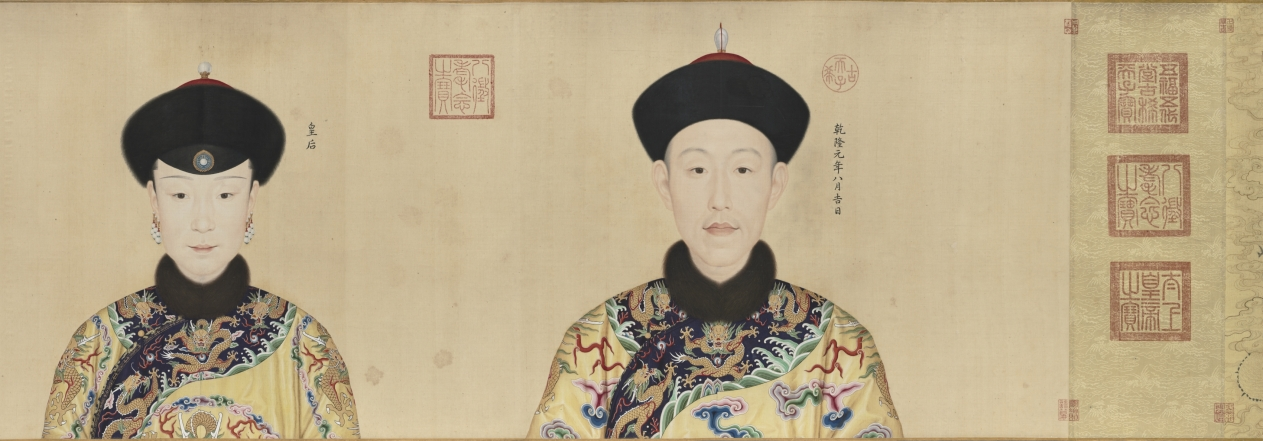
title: Portraits of the Qianlong Emperor and His Twelve Consorts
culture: China, Qing dynasty (1644–1911), Qianlong reign (1736–95)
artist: Giuseppe Castiglione (Italian, 1688–1766)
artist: and others (Chinese)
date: 1736–70s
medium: Handscroll; ink and color on silk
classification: Painting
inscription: 9 seals of the Qianlong emperor (r. 1736–95).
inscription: The eighth month, first year of Qianlong [1736] 乾隆元年八月吉日. The Empress (Xiaoxian) 皇后 (1712–1748), The Guifei (Huixian) 貴妃 (?-–1745), Chunfei 純妃 (1713–1760), Jiafei 嘉妃 (?–1755), Lingfei 令妃 (1727–1775), Shufei 舒妃 (1728–1777), Qingbin 慶嬪 (1724–1774), Yingbin 穎嬪 (1731–1800), Xinbin 忻嬪 (?–1764), Dunfei 惇妃 (1746–1806), Xunfei 順妃 (1749–1788), Shunbin 循嬪 (?–1797).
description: This portrait shows the Qianlong emperor at 26, in the first year of his reign. His likeness is followed by portraits of the empress and eleven consorts. Their portraits document the appearances of the court women around the time when they received their respective imperial titles, which occurred at different stages of the emperor's life. The first three portraits were done by the Jesuit (Roman Catholic) missionary artist Giuseppe Castiglione, whereas the later ones were by Chinese court painters. Formal portraiture contributed to the affirmation of status and construction of role and identity. This scroll served as both familial documentation and a "mind picture" of the Qianlong emperor, suggesting that his constructed image of emperorship was inseparable from concepts of self and family. It was stored in a carved red lacquer box bearing the original painting title Mind Picture of a Well-Governed and Tranquil Reign (see CMA 1969.32).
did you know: Lingfei 令妃 (1727–1775), the first consort depicted in the maroon or “incense-colored" 香色 robe, was the mother of six of Qianlong’s children, including the future Emperor Jiaqing.